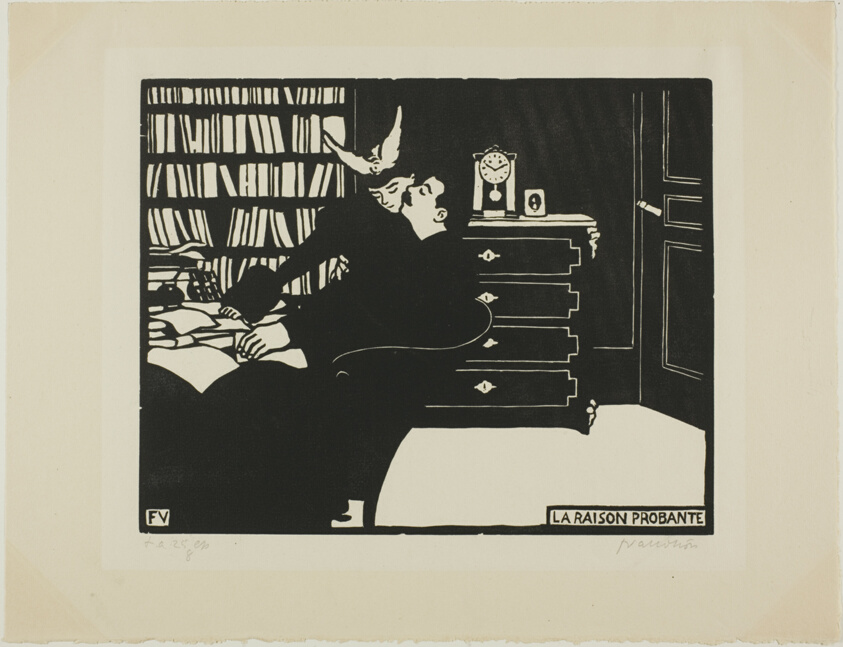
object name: Print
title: The Cogent Reason, plate four from Intimacies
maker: Félix Edouard Vallotton (French, born Switzerland, 1865-1925); published by La Revue blanche (French, 19th-20th century)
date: 1898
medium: Woodcut in black on cream wove paper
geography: France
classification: woodcut; print; prints and drawing